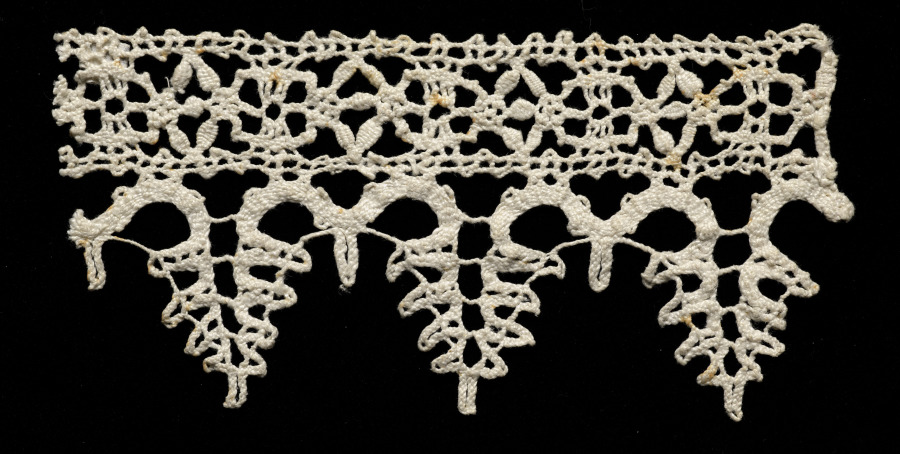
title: Lace Insertion with Edging of Points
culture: Italy, Venice or Genoa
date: 1600–1640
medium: Bobbin lace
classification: Lace